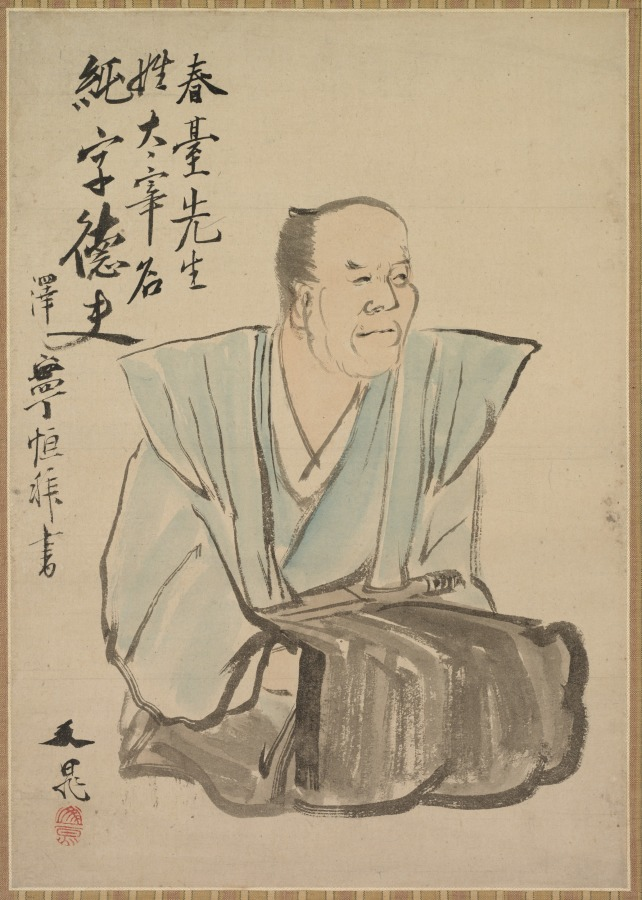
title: Imaginary Portrait of Shundai Dazai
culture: Japan, Edo period (1615–1868)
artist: Tani Bunchō (Japanese, 1763–1841)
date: late 1700s–1800s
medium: hanging scroll; ink and color on paper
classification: Painting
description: Shundai (1680–1747) was a noted Confucian scholar and writer. Brought up with a strongly Confucian family background, Bunchō’s veneration for Shundai is understandable. The inscription is by Nozawa Hikoroku, a scholar and poet contemporary with Bunchō.